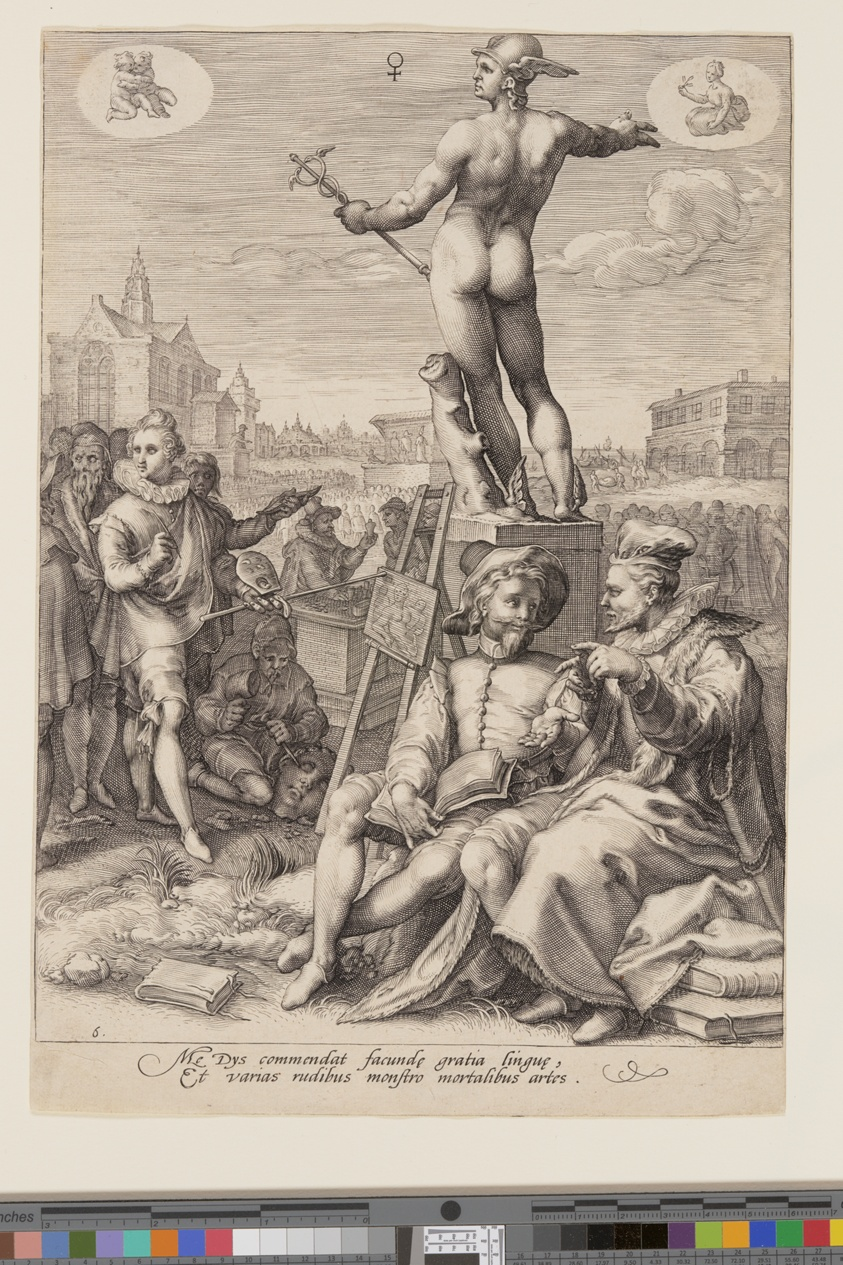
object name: Print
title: Mercury Presiding over the Arts, from Seven Planetary Gods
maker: Jan Saenredam (Dutch, 1565–1607); after Hendrick Goltzius (Dutch, 1558–1617)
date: 1596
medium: Engraving on ivory laid paper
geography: Netherlands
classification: engraving; paper; print; prints and drawing